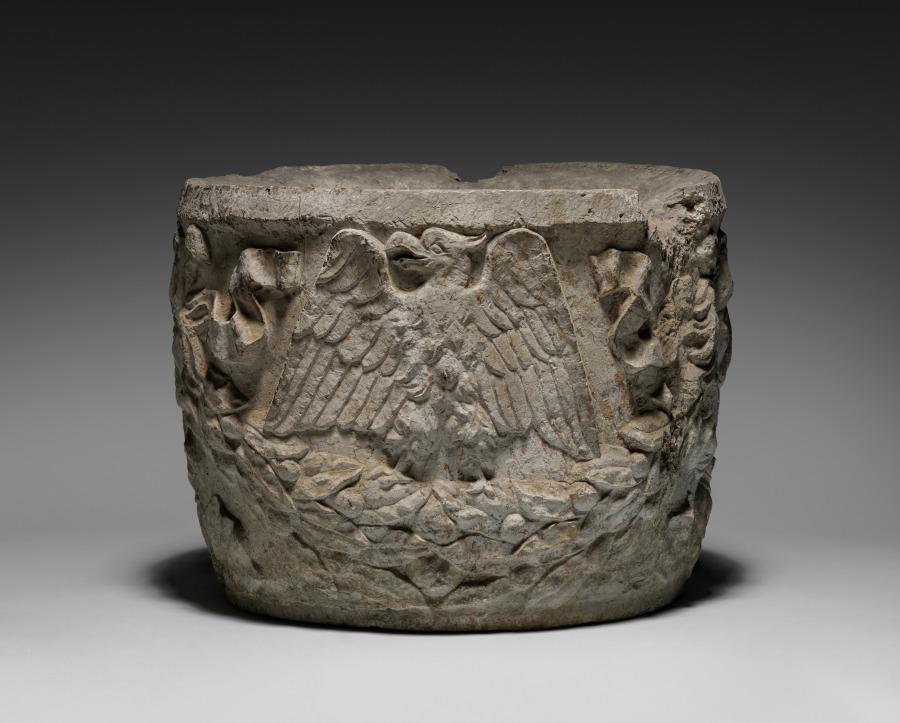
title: Garden Pot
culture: Italy, 19th century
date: 19th Century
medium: stone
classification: Miscellaneous